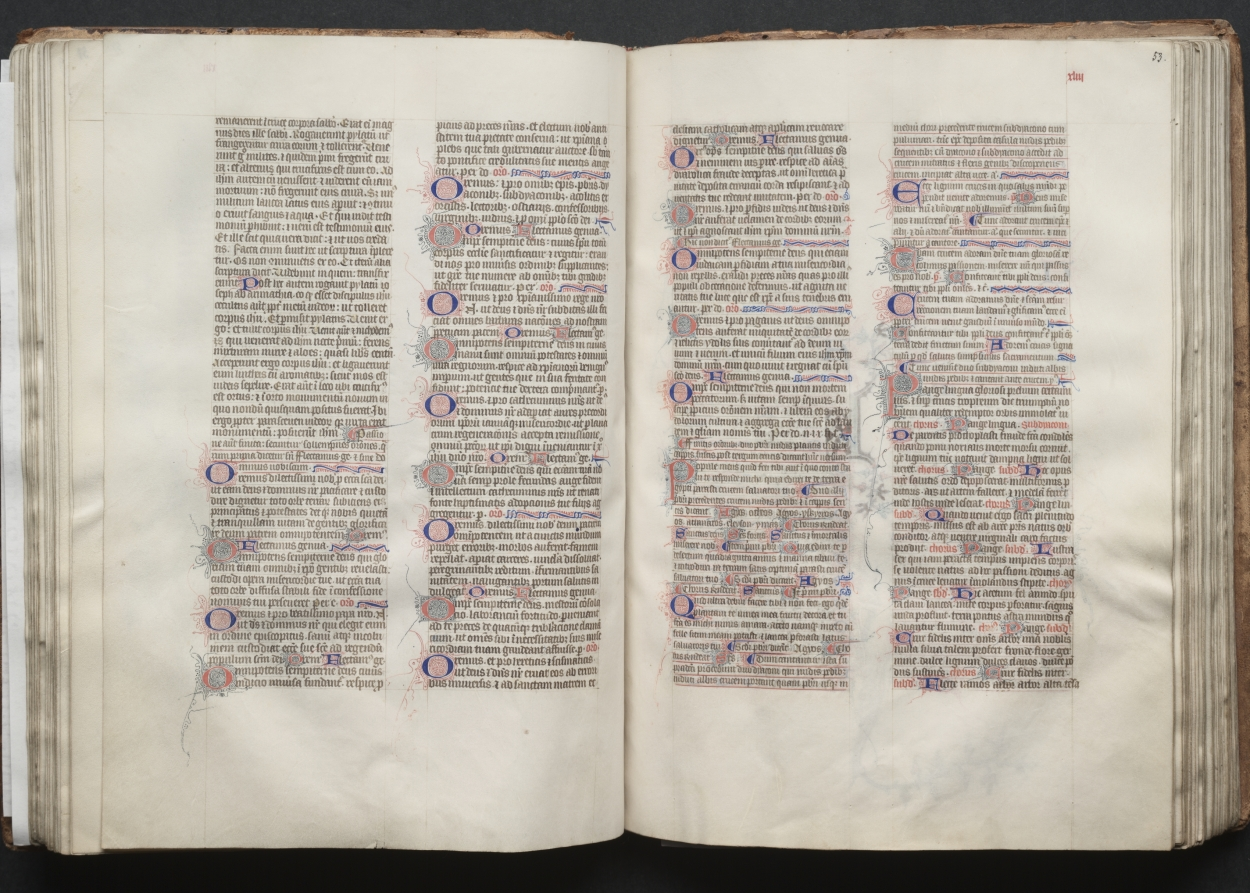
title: The Gotha Missal: Fol. 53r, Text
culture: France, Paris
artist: Master of the Boqueteaux (French)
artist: and Workshop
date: c. 1375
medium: ink, tempera, and gold on vellum; blind-tooled leather binding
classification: Bound Volume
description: The style and quality of this manuscript's decoration is typical of deluxe Parisian books made for aristocratic or royal patrons. Most of the book's decoration appears to be the work of the Master of the Boqueteaux, an artist active at the court of King Charles V (died 1380). His style was apparently shared by a number of book illuminators working in and around Paris. It is very possible that the Gotha Missal belonged to Charles V, but is not provable because the manuscript has no royal portraits and lacks a colophon. Given the book's magnificent decoration, however, it would seem that it was produced for a Valois prince, if not for the king himself. The manuscript receives its name from the German dukes of Gotha, its later owners.